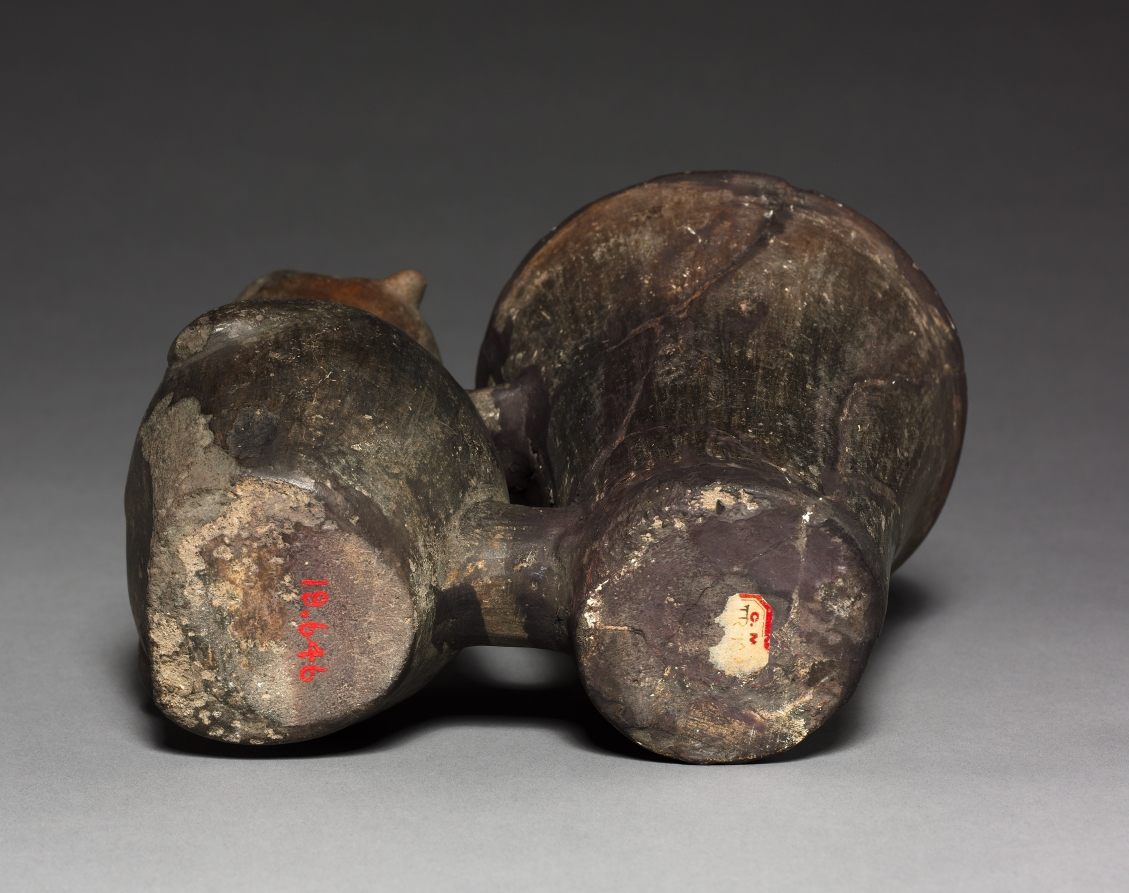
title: Vase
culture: Peru, Huacho Ware?, early 9th Century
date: c. 800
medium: black ware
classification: Ceramic